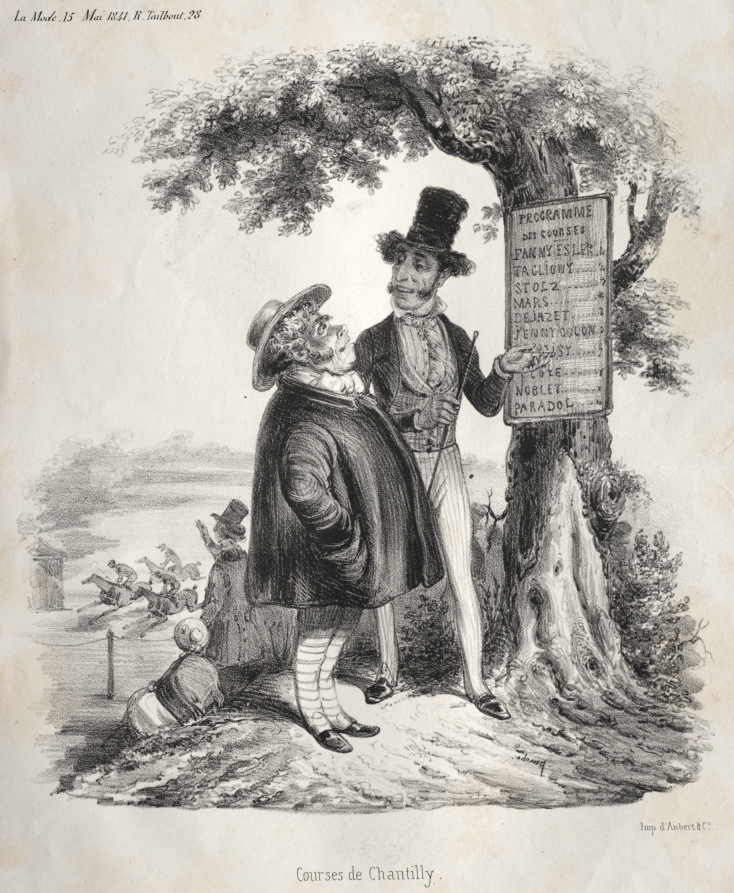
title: Courses de Chantilly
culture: France, 19th century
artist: Clémente Pruche (French, 1831–1870)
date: 1841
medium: lithograph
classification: Print